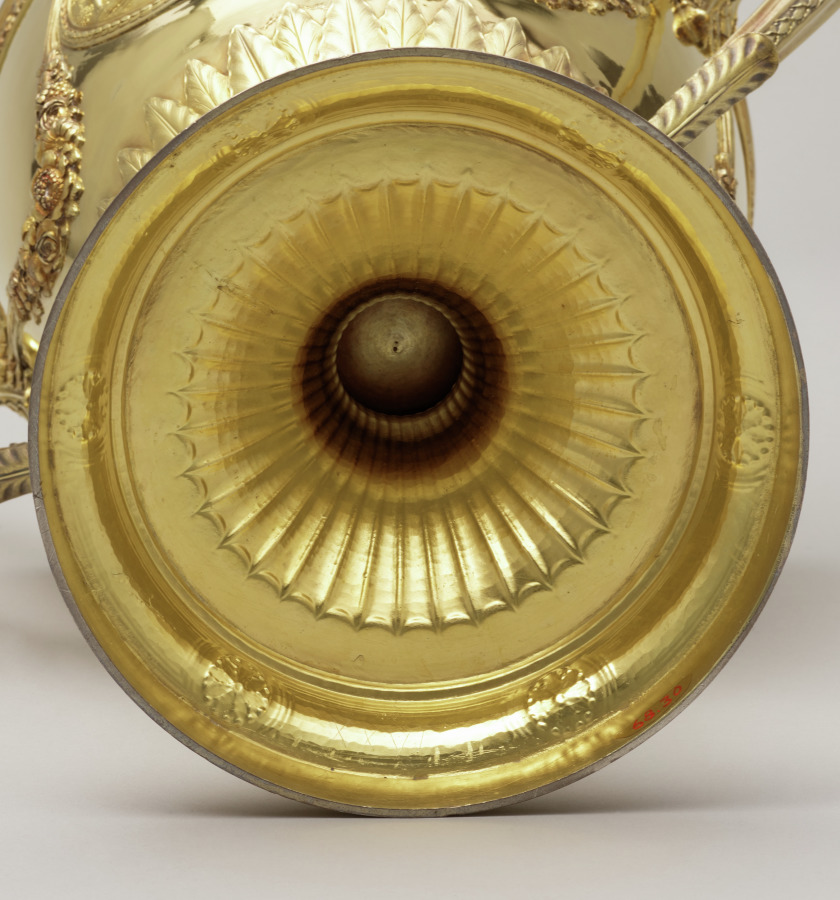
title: Trophy Cup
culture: England, 18th century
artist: Peter Bateman (British, 1740–1825)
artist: Anne Bateman (British, 1748–1813)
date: 1792–93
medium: silver gilt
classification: Silver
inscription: Engraved arms: Grosvenor impaling Egerton and Grey (arms of Robert Grosvenor (1767–1845), the first Marquess of Westminster, and Lady Eleanor Egerton (1770–1846))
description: Silver fulfilled a prominent role in projecting wealth, status, power, and ritual in British life during the 1600s and 1700s. Elaborate forms such as this trophy, with its swags of flowers, neoclassical rosettes, and acanthus spears, not only represented wealth in its sheer silver weight but also provided royal and aristocratic owners a surface for displaying engraved coats of arms. Engraved on one side of this trophy cup can be found the arms of Robert Grosvenor (1767–1845), the first Marquess of Westminster, and Lady Eleanor Egerton (1770–1846), whom he married in 1794, a year after the trophy’s completion. The other side depicts preparations for a horserace, the most culturally significant leisure activity enjoyed by aristocratic families in the 1700s. Grosvenor owned a number of famous horses and was likely awarded this trophy following a successful race.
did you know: This trophy cup has a lid. See cover record.